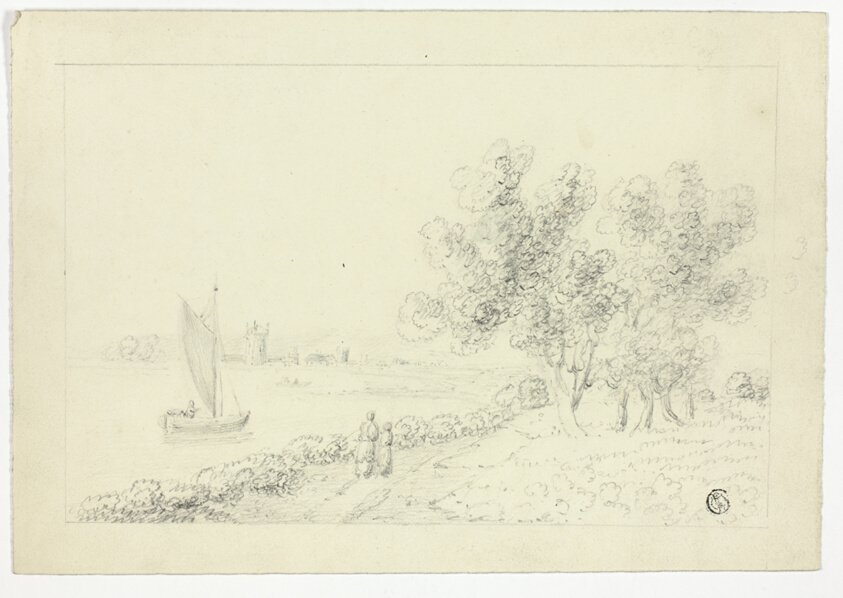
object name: Drawing and Watercolor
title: A Harbor with a Sailboat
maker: Unknown Artist; British,1800-1899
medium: Graphite, with touches of blue colored pencil, on ivory wove paper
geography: United Kingdom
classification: graphite; drawings (visual works); prints and drawing